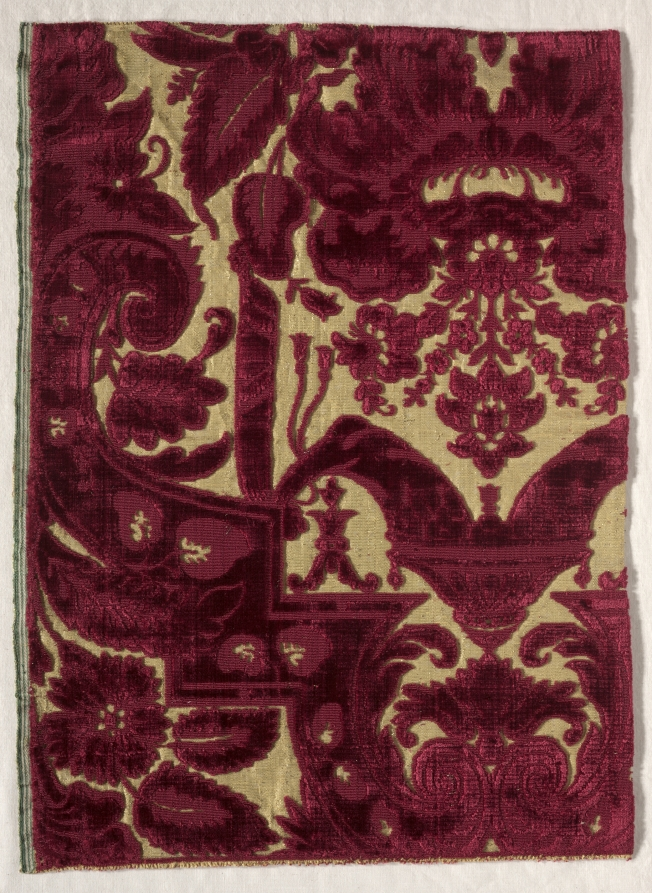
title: Velvet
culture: France, 17th-18th century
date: 1600s - 1700s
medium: velvet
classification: Velvet